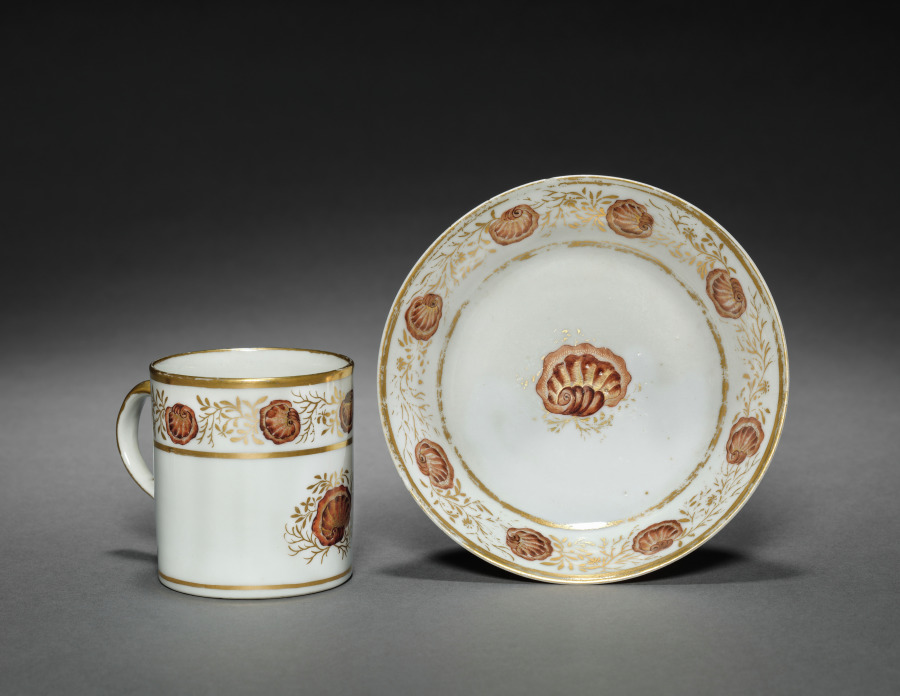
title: Cup and Saucer from Oliver Wolcott, Jr. Tea Service (1 of 6)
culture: Chinese Export porcelain, late 18th-early 19th century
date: 1785–1805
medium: porcelain, sepia enamel, gold leaf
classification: Ceramic